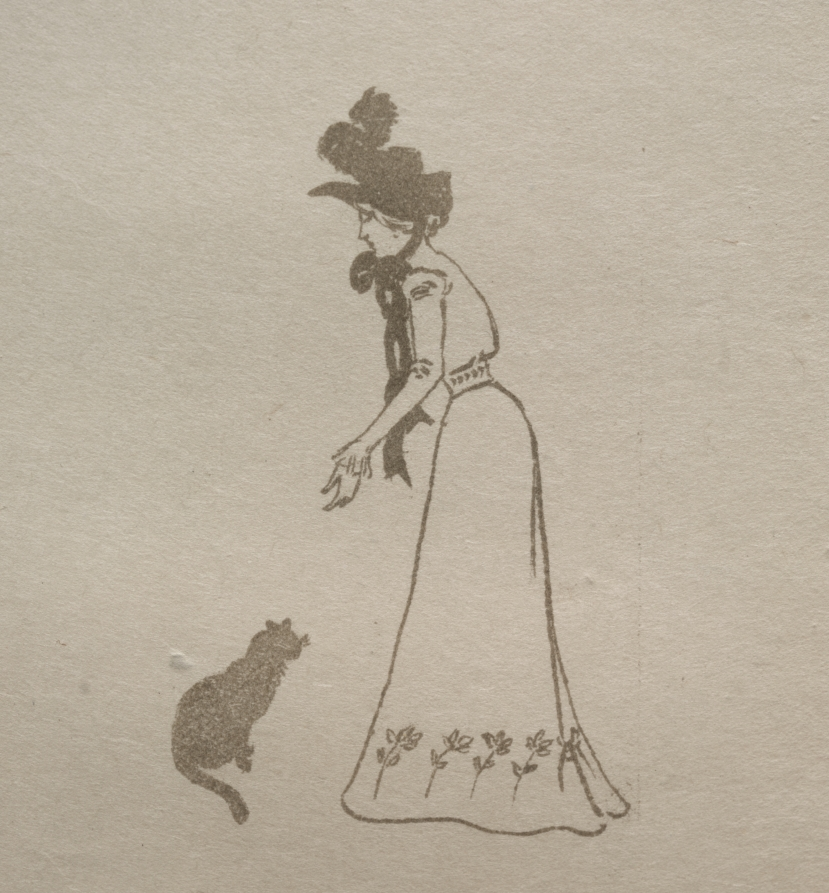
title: Sagot's Gallery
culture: France, 19th century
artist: Georges Alfred Bottini (French, 1874–1907)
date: 1898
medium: color proof of the Remarque Woman with Cat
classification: Print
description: The last decades of the 19th century was the golden era of French color lithography. Jules Cheret (1836–1932) popularized the technique to make colorful posters which, by 1884, were also exhibited as a legitimate art form. In 1891 Cheret began to design posters without lettering to frame and hang on walls—still an unusual idea since prints were usually stored in portfolios. The explosion in color lithography was also encouraged by the use of zinc plates, which were lighter, cheaper, and more pliable than traditional lithographic stones. Also important was the formation of artist's organizations like the Société des artistes lithographie (Society of Lithographic Artists) and the Société de l'estampe originale (Society of Original Prints), which stimulated original printmaking. By the 1890s a proliferation of fine printers, independent exhibitions, publications devoted to prints, critics, publishers, and dealers like Sagot, all supported color lithography.